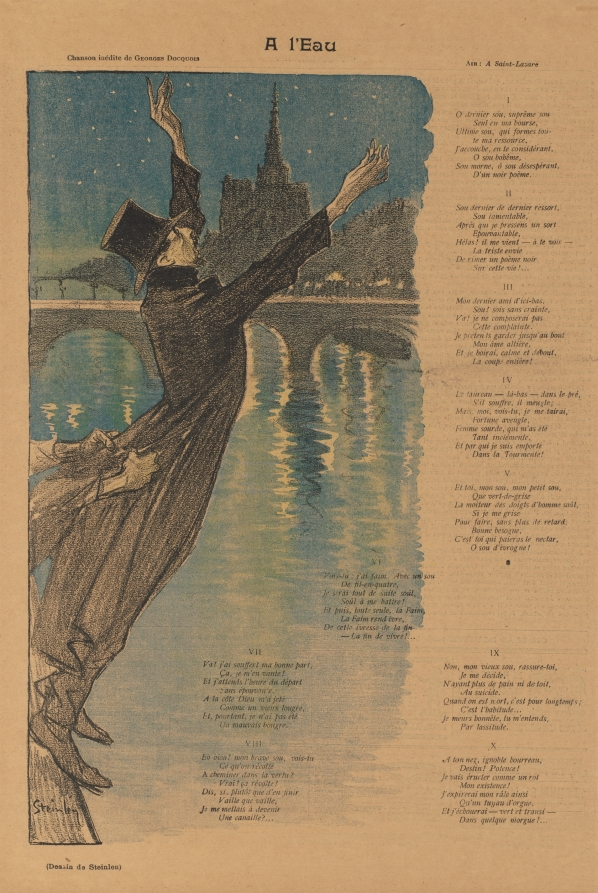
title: Gil Blas Illustré: At the Water's Edge (A l'Eau)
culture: Switzerland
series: Illustration for the song, "A l'Eau", by George Docquois appearing on the last page of October 23, 1896 publication of "Gil Blas Illustré"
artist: Théophile Alexandre Steinlen (Swiss, 1859–1923)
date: 1896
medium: color lithograph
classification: Print